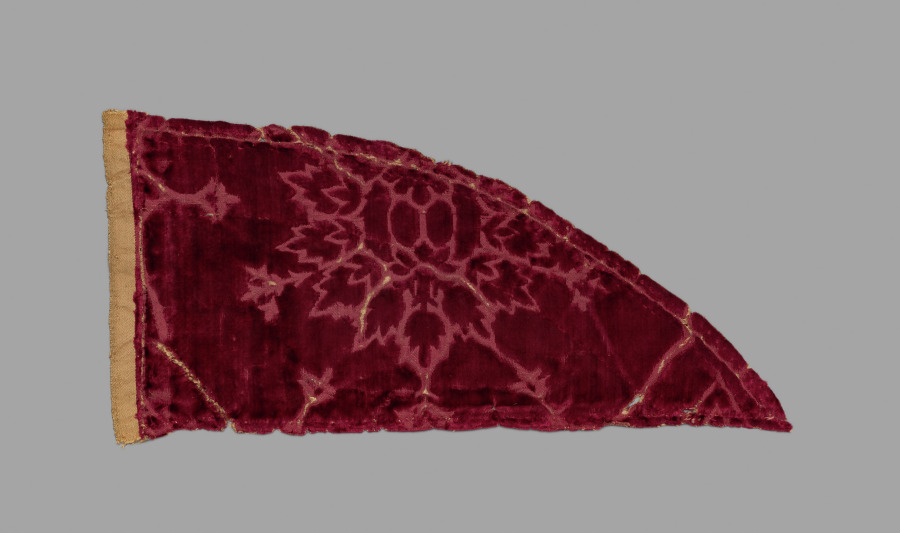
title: Pieces from Disassembled Cape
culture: Italy, 15th century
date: 1400s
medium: velvet (cut and voided); silk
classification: Velvet